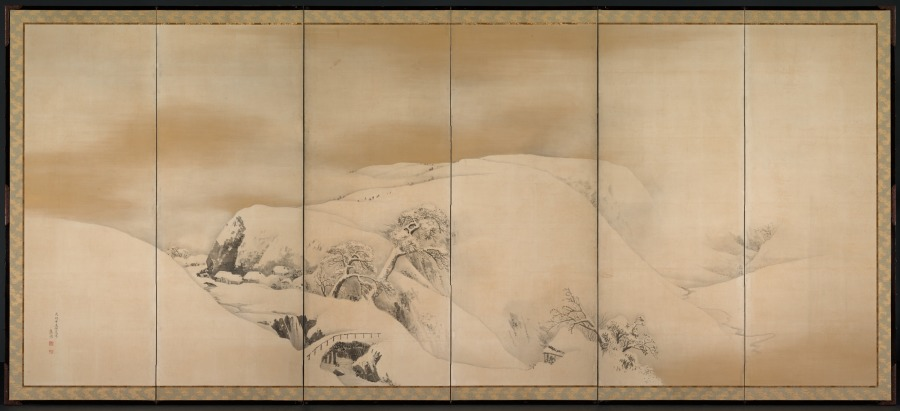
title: Winter Day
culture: Japan, Edo period (1615–1868)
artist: Maruyama Ōkyo (Japanese, 1733–1795)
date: 1784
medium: Six-panel folding screen, ink, gold, and silver on paper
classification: Painting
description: Ōkyo painted these panoramas in the summer of 1784. Regarded as Kyoto's most important painting teacher and accomplished artist, he had studied Western painting techniques, "realistic" sketching from nature, and traditional Japanese style painting (yamato-e). The naturalistic quality of these scenes results from a blend of detailed observation of nature and a remote, even detached regard for man's place in the world.